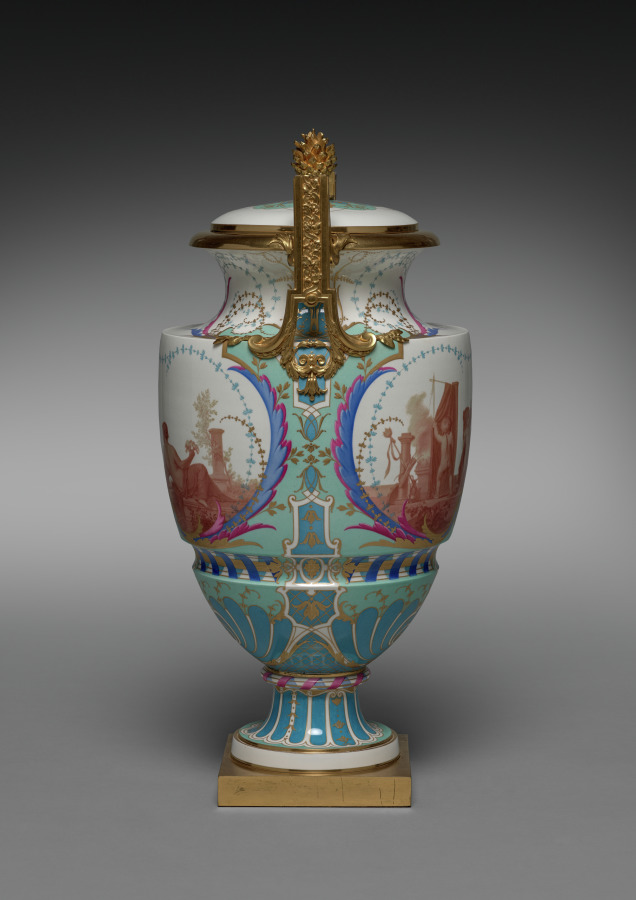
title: Vase Feuille d'Eau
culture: France, Sèvres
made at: Sèvres Porcelain Factory (French, est. 1756)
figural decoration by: Paul Marie Roussel (French, 1804–1877)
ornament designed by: Emile Renard (French)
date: 1858–62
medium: porcelain with gilt bronze mounts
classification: Ceramic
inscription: figural paintings signed obverse and reverse: "PMROUSSEL INV & PIN"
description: Feuille d'Eau means "waterleaf" and refers to the name given to the shape of this vase at the Sèvres factory. In English, waterleaf is the common name for a plant with bell-shaped flowers. The term is also applied to a stylized plant motif used in Graeco-Roman ornament. This vase was exhibited by the Sèvres firm at the International Exhibition held in London in 1862.